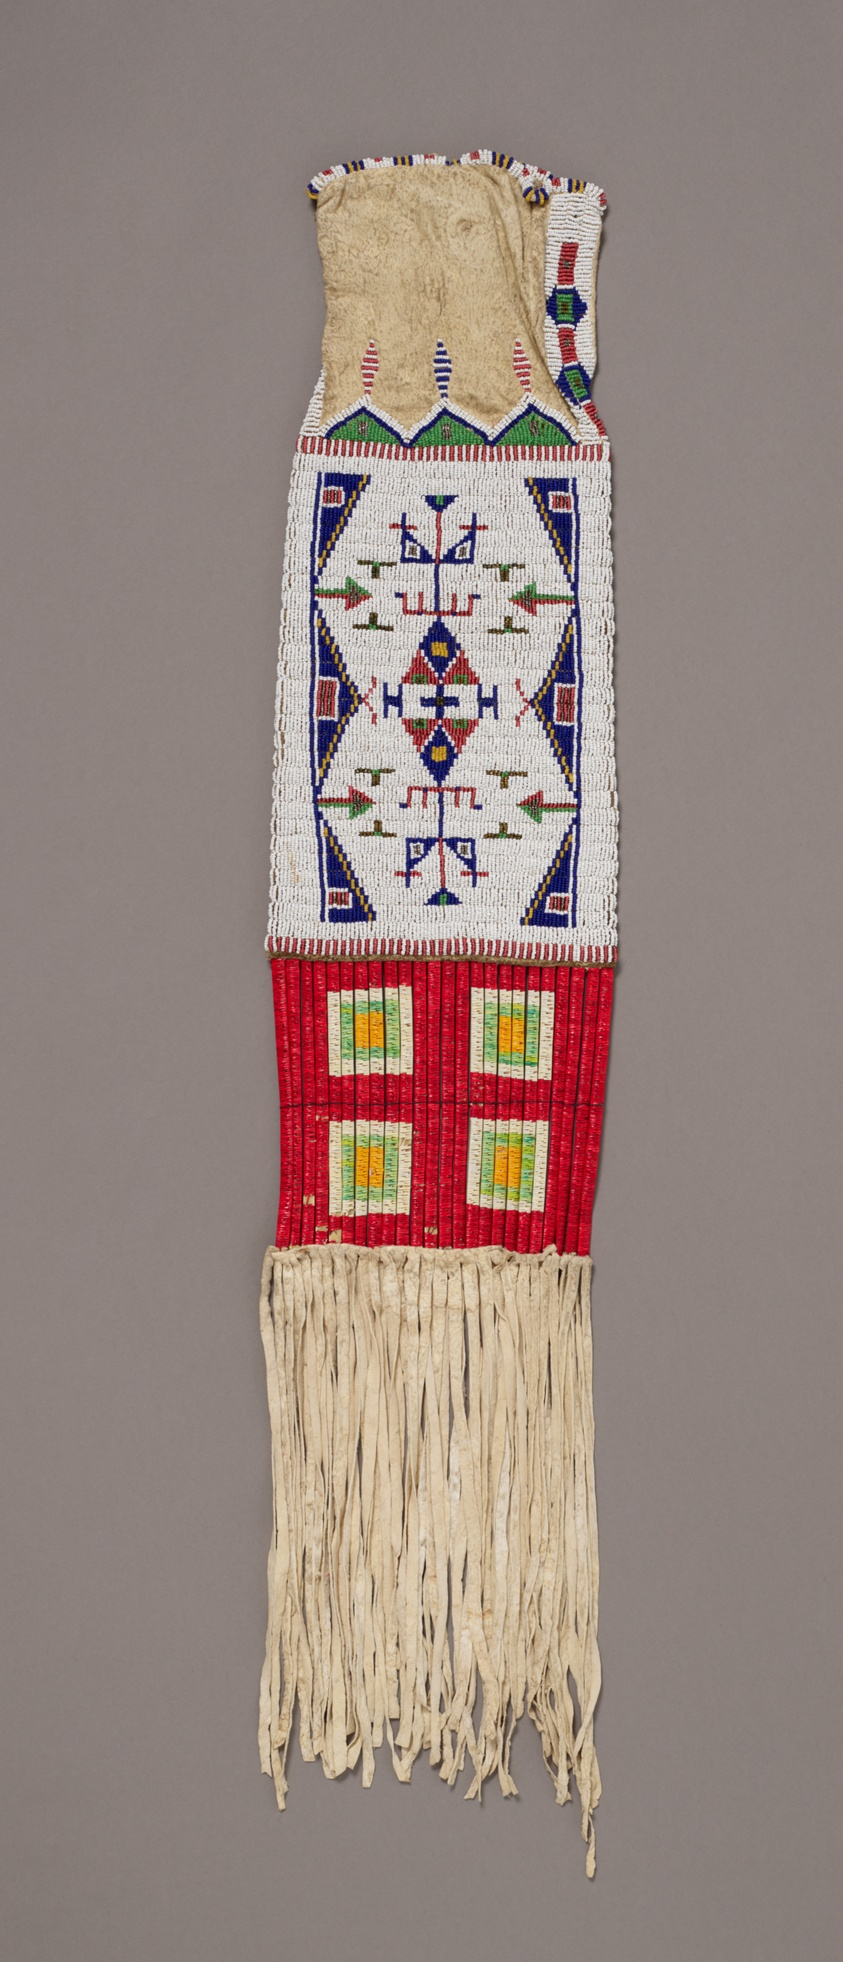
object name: Religious/Ritual Object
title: Pipe Bag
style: lakota, santee, sioux, plains indian, native american, americas, native north american, Arts of the Americas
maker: Lakota (Wyoming, central or northern Plains, United States)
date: c. 1885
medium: Deer hide, porcupine quills, tin cones, horsehair, and glass and metal beads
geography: Wyoming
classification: beadwork; art of the americas; costume accessory; ritual objects